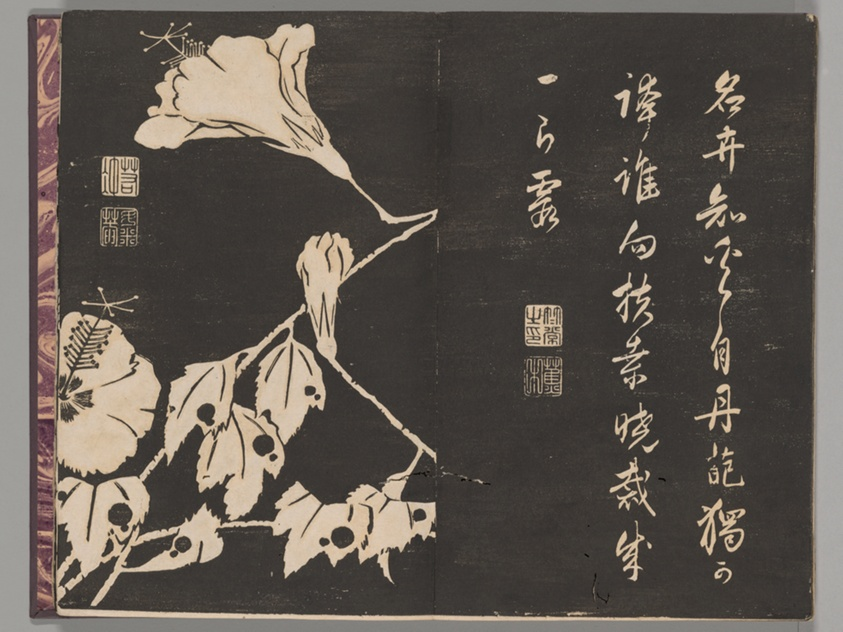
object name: Book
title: Soken sekisatsu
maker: Ito Jakuchu (Japanese, 1716-1800)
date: 1767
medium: Woodblock printed book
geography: Japan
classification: book